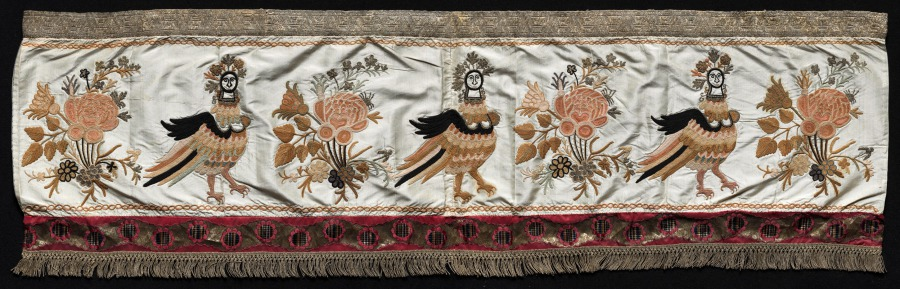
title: Border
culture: Russia, Nizhny-Novgorod province, early 19th century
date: c 1800– 1825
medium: plain weave silk (est.) ground with polychrome silk (est.) and metal thread chain stitch embroidery; applied silk (est.) ribbon and metal thread trims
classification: Embroidery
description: This Russian embroidered panel was likely used to embellish the end of a bathing towel. Textiles of this type are valuable for their fine embroidery of ancient folk motifs, ritual significance, exemplification of the role of textiles in their society, and in this case, connection to a prominent woman collector, Natalia de Shabelsky, without whom this textile and others like it might have been lost.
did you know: Embroidering the ends of everyday towels was a common folk tradition in many cultures because it displayed the skill of the mother or daughter who stitched them.